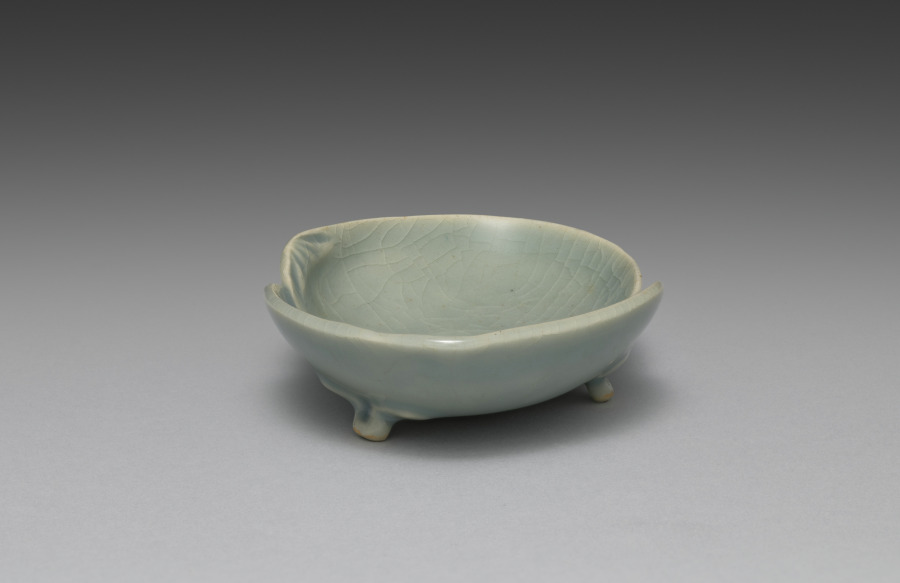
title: Dish from Saucers with Matching Shells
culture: Japan, Meiji period (1868–1912)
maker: Seifū Yohei III (Japanese, 1851–1914)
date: 1893–1914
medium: Porcelain with molded design and green crackled glaze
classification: Ceramic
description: Yohei III’s main output for his sophisticated clientele was in the form of tea sets and dining sets. He created a range of dishes in green glazes. He often produced in pairs, sets of five, or sets of ten. The set of five dishes with a more complex form is described as having a “water-colored glaze” (mizuiroyū). These are shaped like clam half shells, a reference to a game in which shell halves painted with narrative scenes or a variety of motifs must be matched back together by the players. The dishes have molded details to articulate the shell forms, and the crackling across each shell adds another dimension to the surface. Each dish is set on three small feet, formed by a pinched piece of clay and attached to an unglazed area on the underside of the dish. Curiously, while four of the dishes are stamped with the artist’s mark, one has instead a signature carved into the base.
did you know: The saucers are meant to look like matched halves of clam shells in reference to a once popular game.